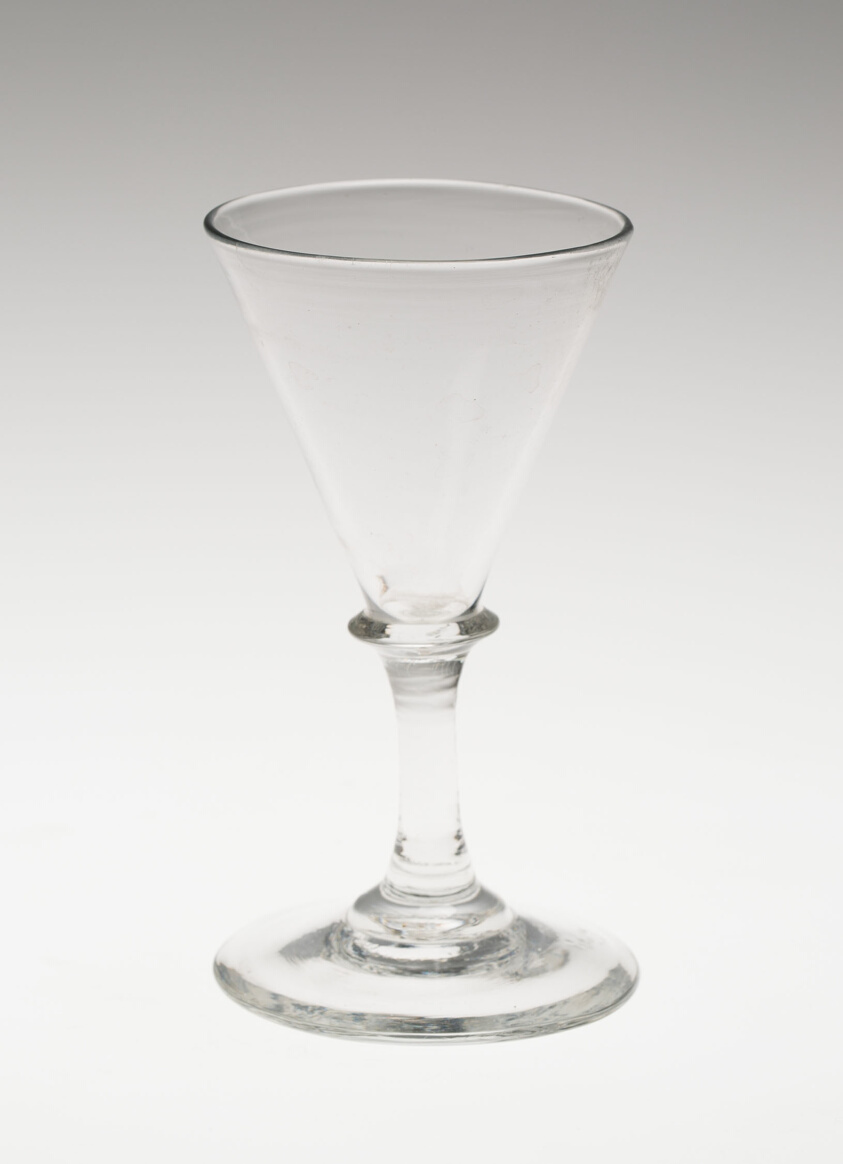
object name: Glass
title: Wine Glass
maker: England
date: c. 1720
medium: Glass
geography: England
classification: drinking vessel; glass